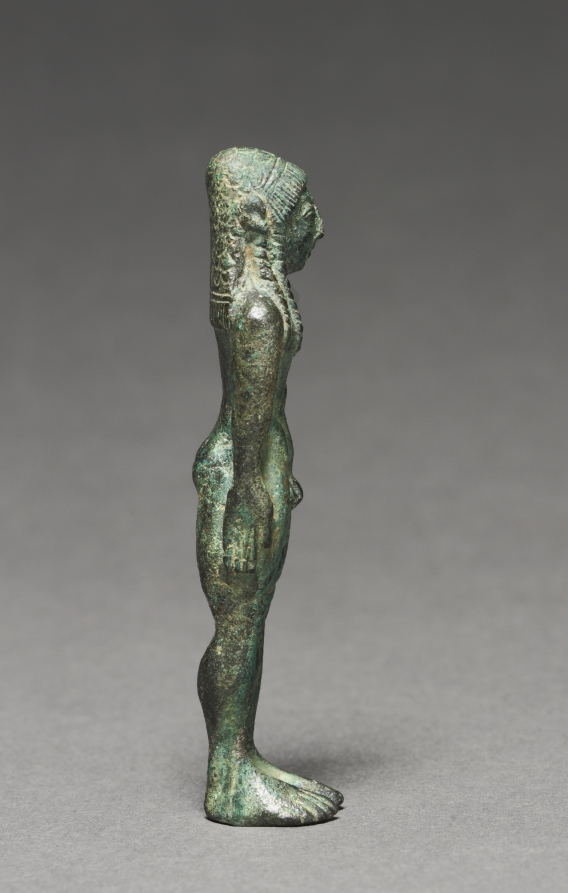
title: Statuette of a Kouros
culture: Etruscan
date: 600–480 BCE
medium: bronze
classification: Sculpture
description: Though almost certainly Etruscan in origin, this small-scale bronze takes the form of a Greek kouros, a nude male youth with arms at sides looking straight ahead. The left foot appears ever so slightly advanced, but not enough to create any real sense of movement. Two long locks of hair fall over each shoulder, recalling Ionian (East Greek) examples, but the scale-like pattern on the back of the head is unusual. Despite the lack of nudity in most other Archaic Etruscan artworks, the kouros became quite popular as a small bronze votive type in Etruria.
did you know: Unlike Greek kouroi, which range in medium and scale, Etruscan kouroi are primarily small bronzes.